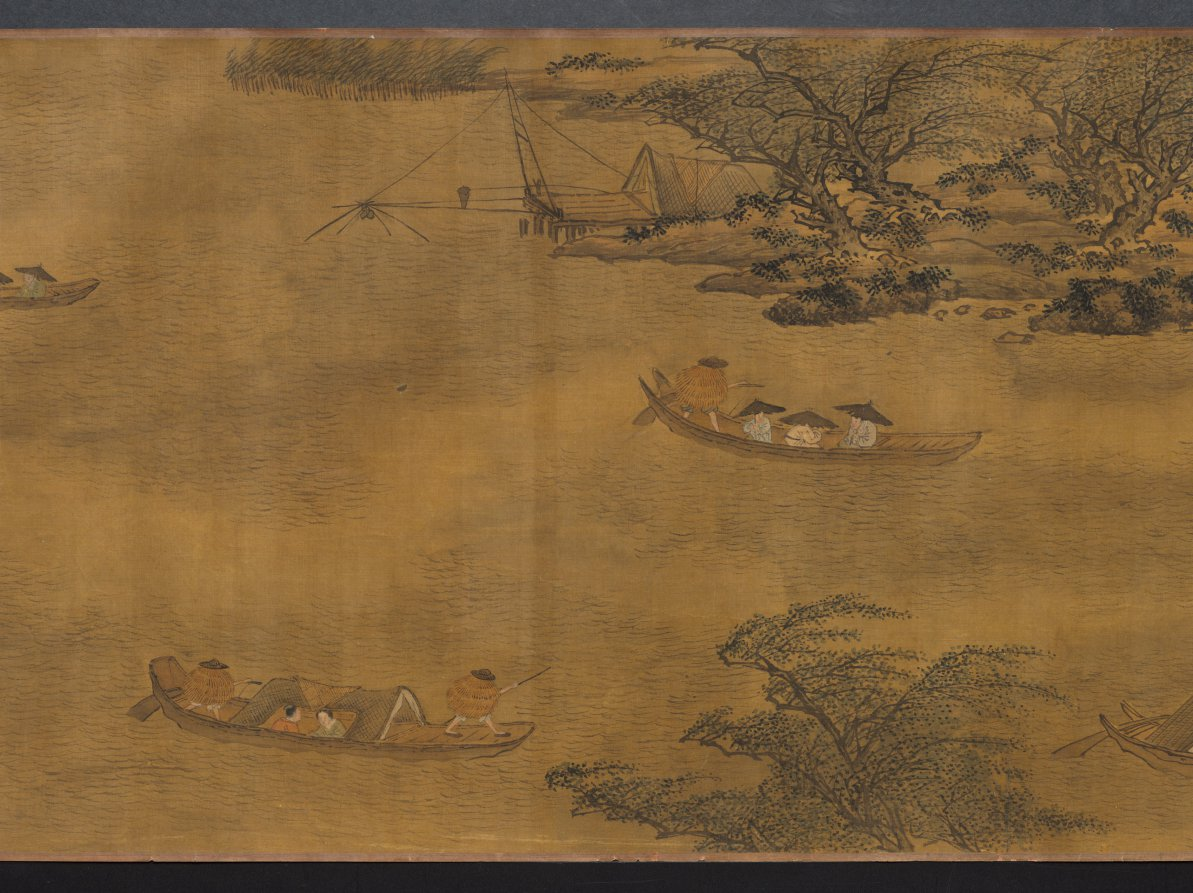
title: Returning to the Village in a Rainstorm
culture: China, Ming dynasty (1368–1644)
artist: Xie Shichen (Chinese, 1487–after 1567)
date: 1530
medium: Handscroll; ink and light color on silk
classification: Painting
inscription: 風雨歸村圖 嘉靖庚寅秋日樗仙謝時臣. [印] 謝時臣印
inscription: 3 additional seals unidentified.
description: This scroll depicts a wind- and rainswept landscape with figures in the countryside struggling against a late summer monsoon rainstorm. Such weather was familiar to residents of the lower Yangzi delta. Xie Shichen spent most of his life in the Suzhou area. Details of his career are scant, but his surviving works suggest that he made his living as a professional painter. This painting conveys drama and anecdotal observations, characteristic of Zhe school paintings, such as the one by Lü Wenying, CMA 1970.76.